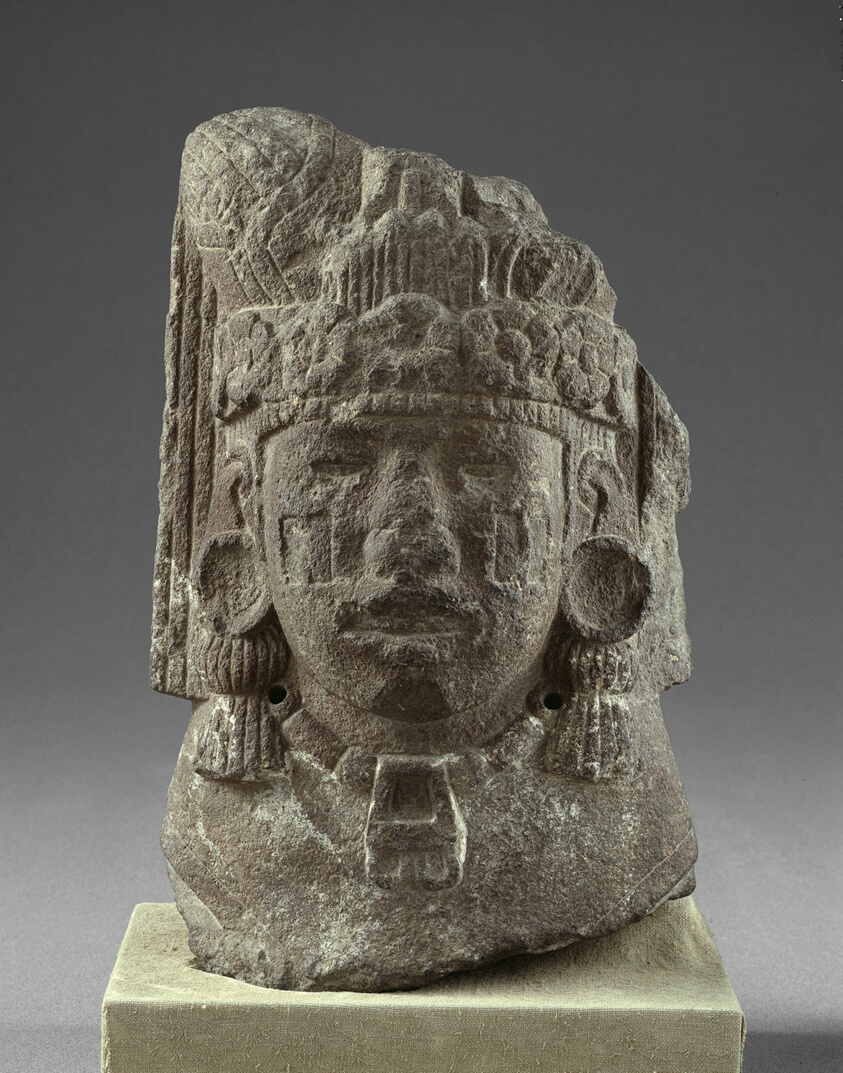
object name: Sculpture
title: Head of Xilonen, the Goddess of Young Maize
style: aztec, mesoamerican, Pre-Columbian, americas, Arts of the Americas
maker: Aztec (Mexica) (Tenochtitlan, Mexico)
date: 1400–1500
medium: Basalt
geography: Tenochtitlan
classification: stone; sculpture; art of the americas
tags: landscapes, cornstalks, agriculture, goddesses, maize, mythology